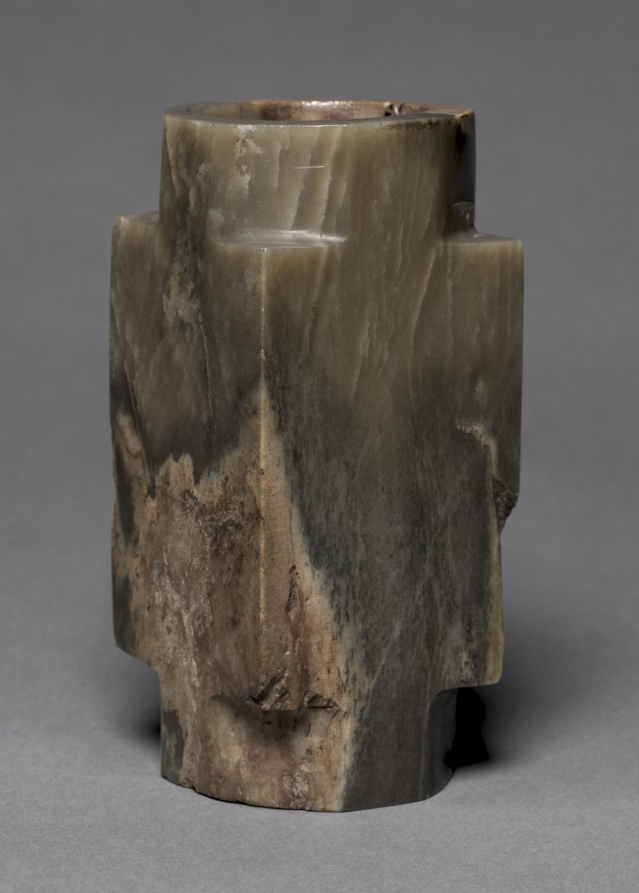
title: Ceremonial Tube (Cong)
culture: China, Shang dynasty (c. 1600–c. 1046 BCE)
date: c. 1600–1056 BCE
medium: jade (nephrite)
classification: Jade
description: The cong, a cylindrical tube with a square outer section, was one of the most impressive jade implements used in ancient rites. The ritual text Rites of Zhou mentions the use of the cong for the worship of the earth. However, its function and meaning in the earlier Neolithic societies are not completely understood.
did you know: The Interior cavity of this piece of jade was bored from both ends, making an irregular ridge near the center.